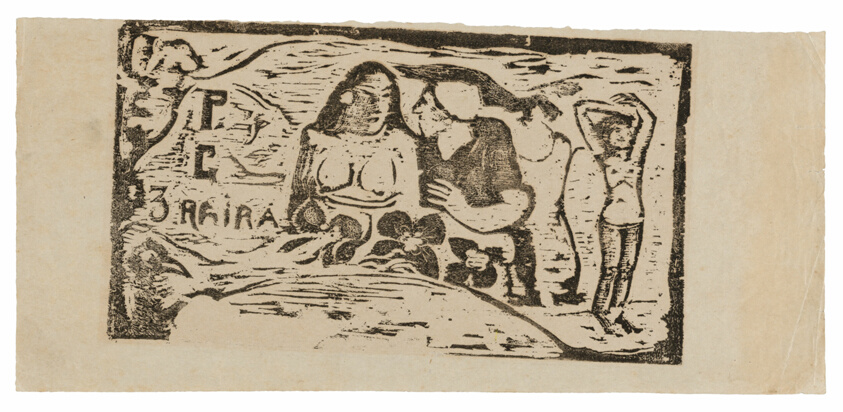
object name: Print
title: Bust of a Nude Woman and Three-Quarter Figure of a Man with a White Cap in Profile, Third Small Figure at Far Right, headpiece for Le sourire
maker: Paul Gauguin (French, 1848-1903)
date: 1899/1900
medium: Wood-block print in black ink on cream wove paper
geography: France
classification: woodcut; print; prints and drawing